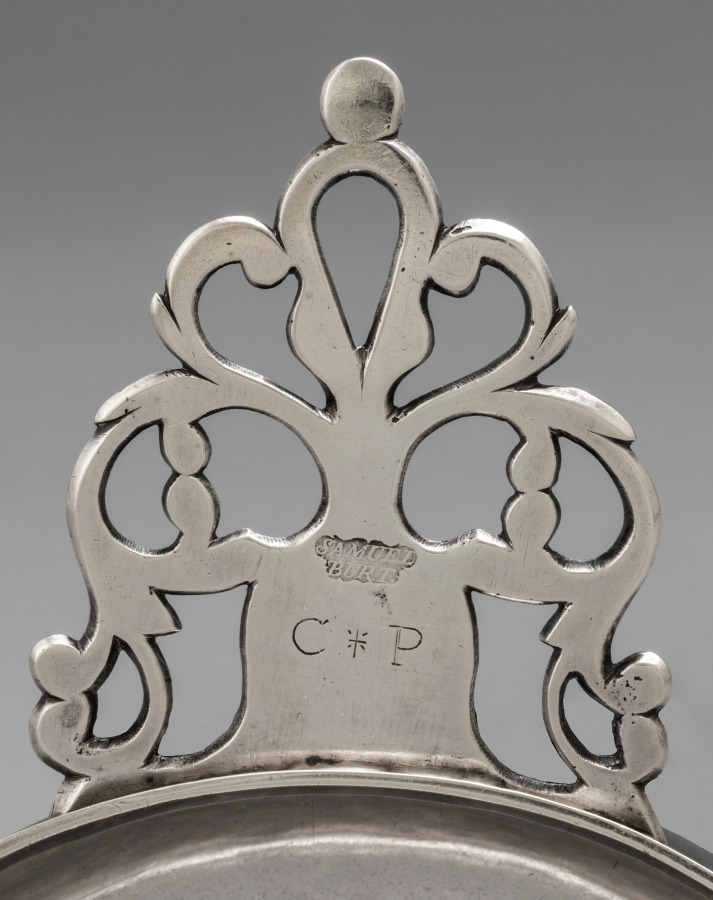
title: Porringer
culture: America, Massachusetts, Boston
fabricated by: Samuel Burt (American, 1724–1754)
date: 1740–50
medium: silver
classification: Silver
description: "Porringer" was the term used in America for a bowl with one handle.